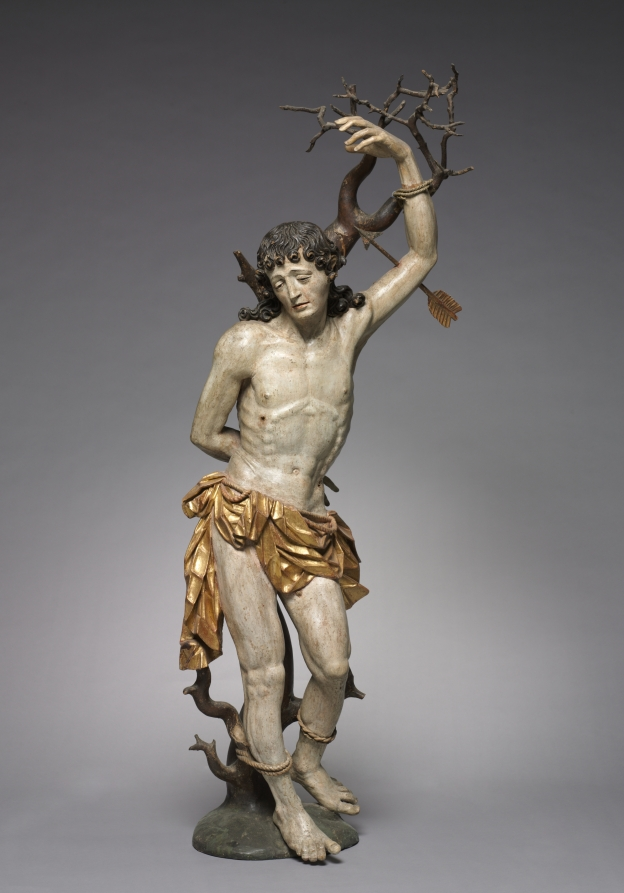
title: Saint Sebastian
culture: Germany, early 17th century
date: c. 1600–1620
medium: painted and gilded wood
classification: Sculpture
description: An early Christian saint and martyr, Sebastian was condemned to death by the Roman emperor Diocletian. Bound to a tree and shot with arrows, he survived—only later to be martyred by beating. This figure embodies the blend of stylistic influences that characterized German sculpture in the early 1600s. The graceful pose and anatomical naturalism of the legs indicate the influence of Italian Mannerism, while the crisp, stylized patterns of Sebastian’s hair and loincloth recall German Gothic works from the 1400s. The tree to which Sebastian is bound is an actual branch, shaped and refined to its present appearance.